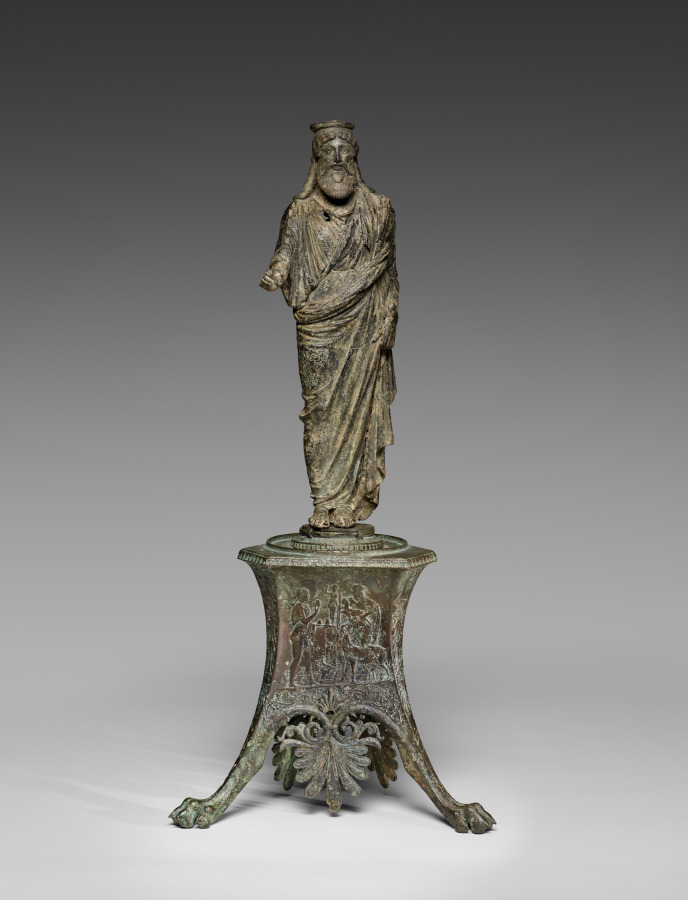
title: Statuette of Dionysos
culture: Italy, Roman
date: 50 BCE–50 CE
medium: bronze and silver and traces of gilding, hollow cast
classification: Sculpture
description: This bronze figure of Dionysos, the god of wine, theater, and the mysteries, is presented in a style recalling Archaic Greek art, most noticeably in his stiff pose and trimmed beard. The more naturalistic folds of his garment speak to a later date, in the Roman period. The disk attached at the top of the head suggests that this figure was once part of an ornate piece of furniture, perhaps a stand or support. In his right hand, the god likely held a kantharos or other attribute. He would have been further embellished with inlaid copper (lips), silver (whites of eyes), and perhaps gilding (garment).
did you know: Over his long, thin garment, Dionysos wears an animal skin, fastened on his left shoulder.